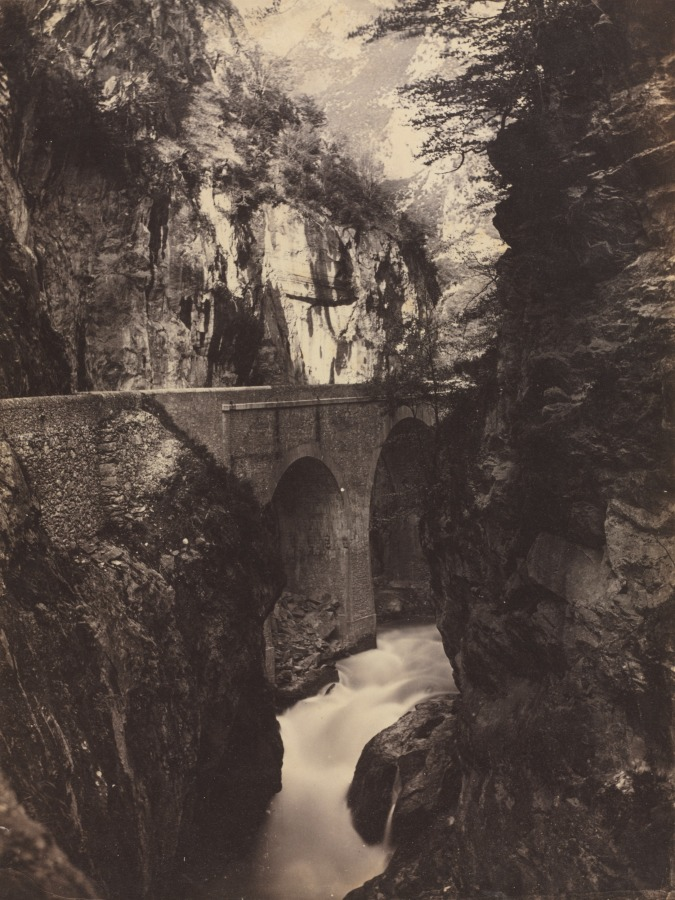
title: Road to Eaux-Chaudes, Pyrenees (recto); Eaux-Chaudes, Pyrenees (verso)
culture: England, 19th century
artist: Farnham Maxwell Lyte (British, 1828–1906)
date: c. 1855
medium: albumen print from wet collodion negative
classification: Photograph